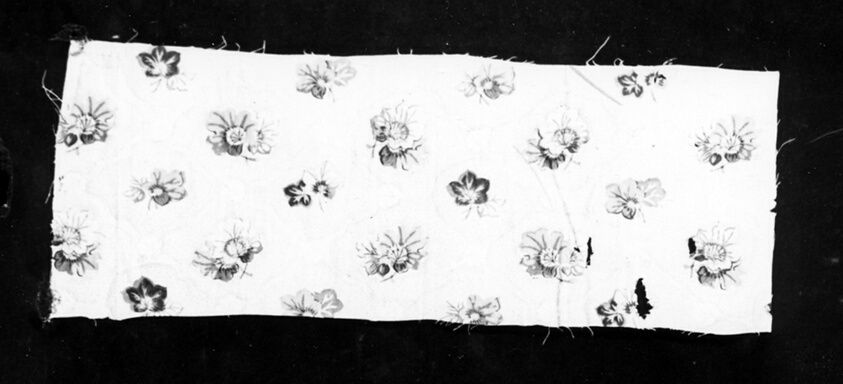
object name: Textile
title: Panel (Furnishing Fabric)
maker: England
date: c. 1840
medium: Cotton, plain weave; roller printed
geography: England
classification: textile; weaving - printed; weaving; furnishing textile